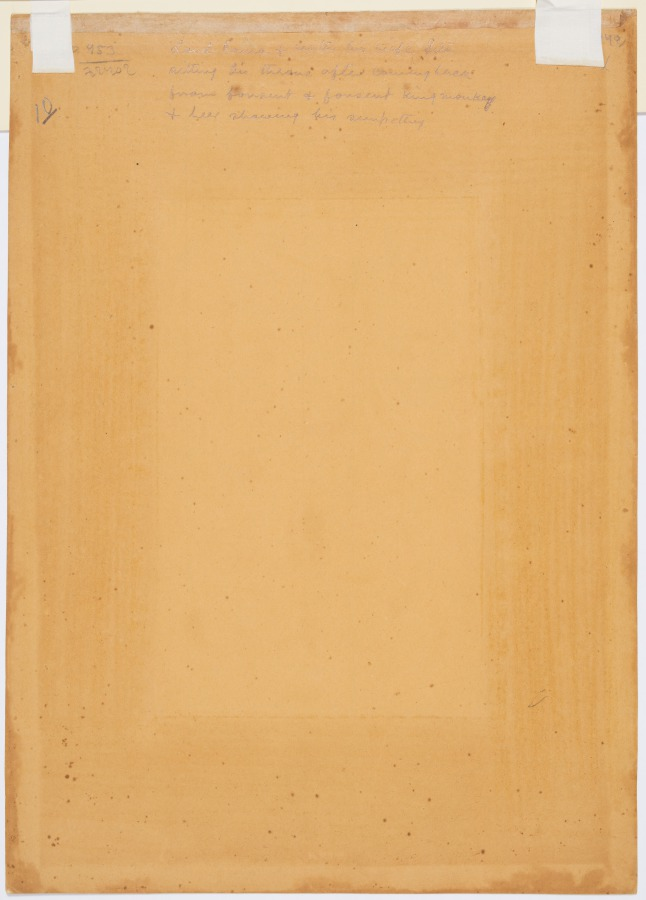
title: Enthroned Rama and Sita receive homage from their monkey and bear Allies, from the Yuddha Kanda (Book of the War) of a Ramayana (Rama’s Journey)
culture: Northern India, Pahari kingdoms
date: c. 1765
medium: gum tempera and gold on paper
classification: Painting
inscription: [[verso, upper center, in English, four lines]] Lord Rama + with his wife Sitā sitting his throne after coming back from (forest) + (forest) king monkey + (here) showing his (sumptuary)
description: This scene is set at the end of the Hindu epic Ramayana, after Rama returns from 14 years of exile in the forest. During Rama’s time of exile, Ravana abducted Rama’s wife Sita. Rama gathered an army of monkeys and bears, and rescued Sita. The chiefs of the monkey and bear armies pay their respects to the reunited royal couple.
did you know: Rama’s three brothers can be seen at the right side of the painting.